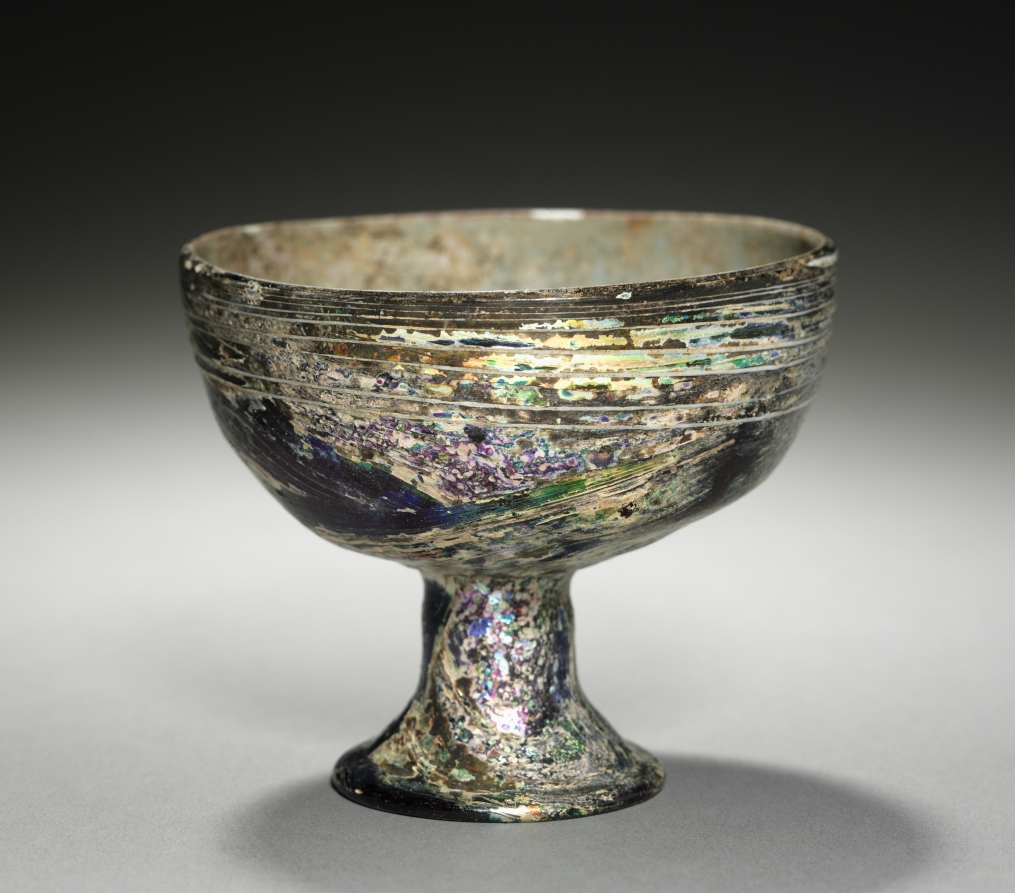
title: Chalice (?)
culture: Italy, Roman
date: 100–300 CE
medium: glass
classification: Glass